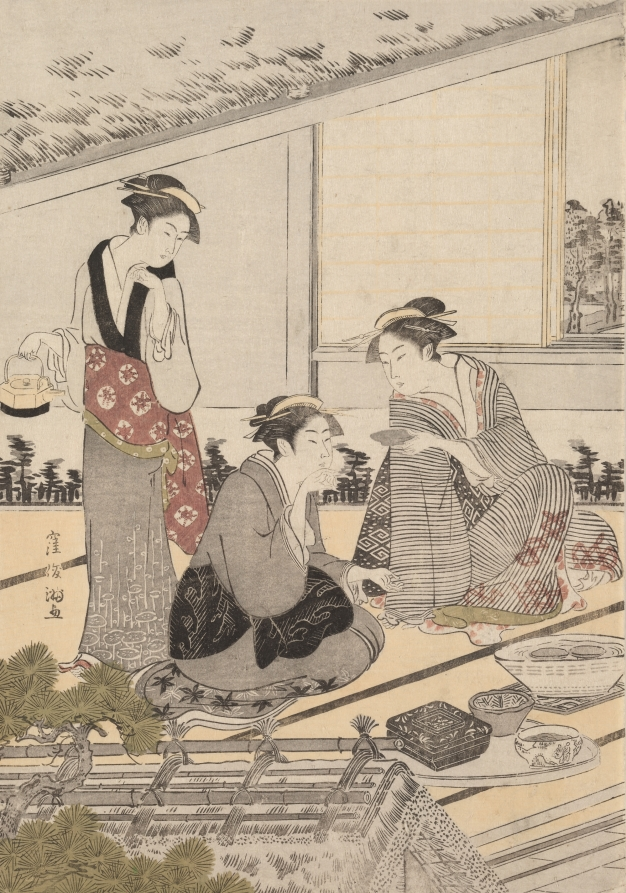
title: Women in a Tea House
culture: Japan, Edo period (1615–1868)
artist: Kubo Shunman (Japanese, 1757–1820)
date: late 1780s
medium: color woodblock print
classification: Print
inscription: Signature: Kubo Shumman ga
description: This elegant print provides a glimpse into the private life of the courtesan, recording a quiet moment of enjoying tea. Shunman often depicted bijin (beautiful women) in a landscape setting, using subdued color harmonies featuring grays, pale green, and pale purple. In addition to being a printmaker, Shunman was also an accomplished painter, poet, and skilled worker in metal inlay and lacquer.